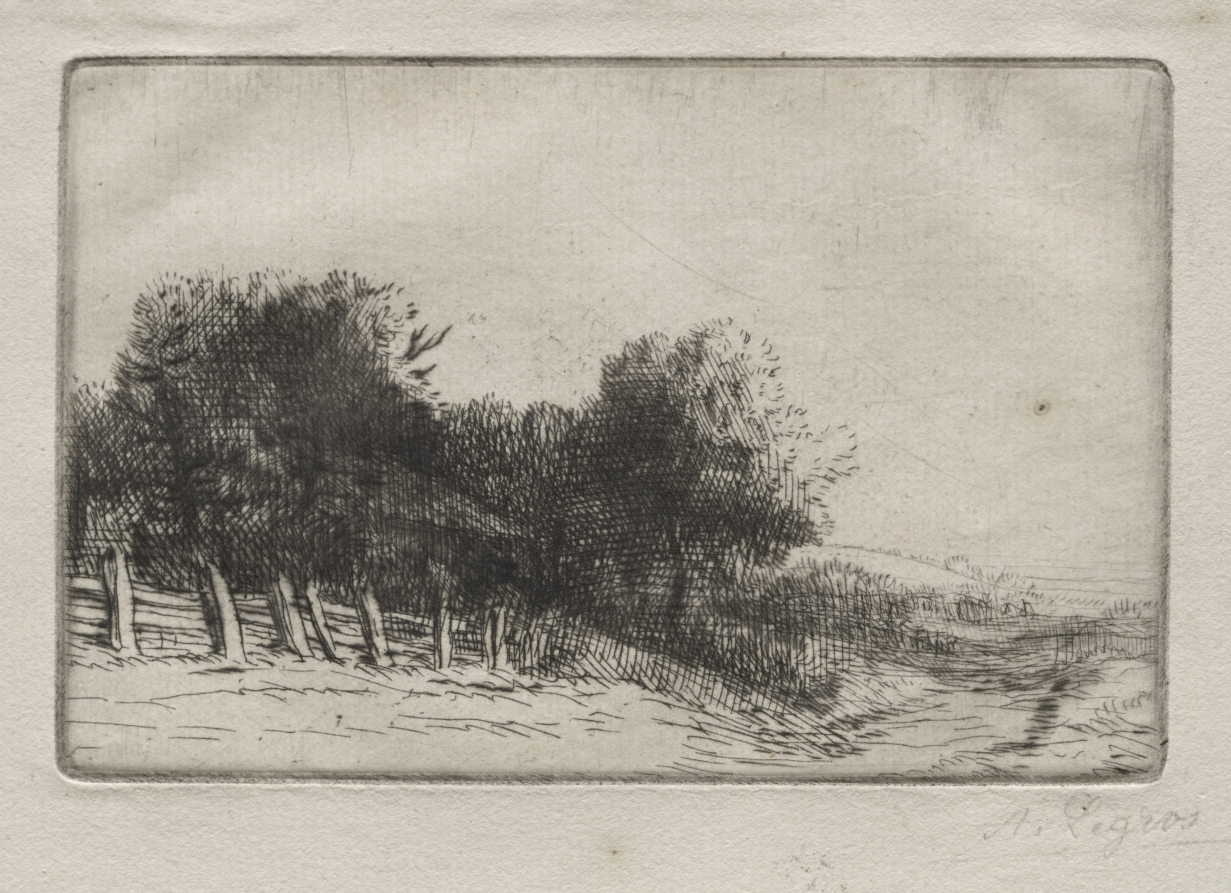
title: Landscape (Un Paysage)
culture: France, 19th century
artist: Alphonse Legros (French, 1837–1911)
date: c. 1857–1911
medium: etching and drypoint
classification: Print